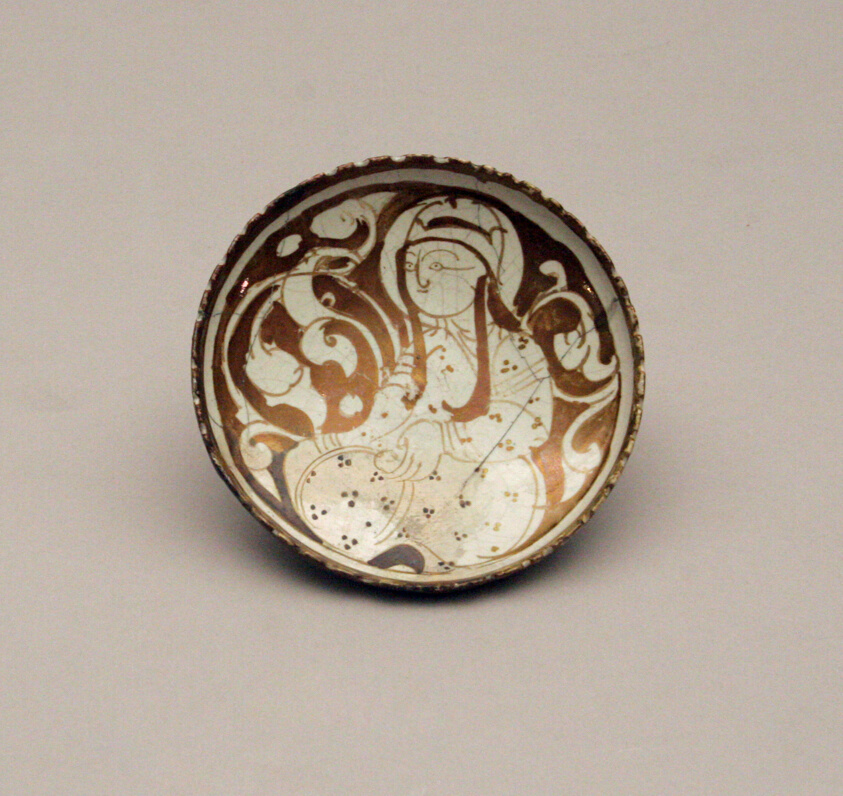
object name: Ceramics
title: Dish with a Seated Figure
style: rayy, Islamic (culture or style)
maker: Iran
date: Late 12th/early 13th century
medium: Lusterware, fritware painted in luster over an opaque white glaze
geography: Iran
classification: dish (vessel); asian art; ceramics; decorative arts